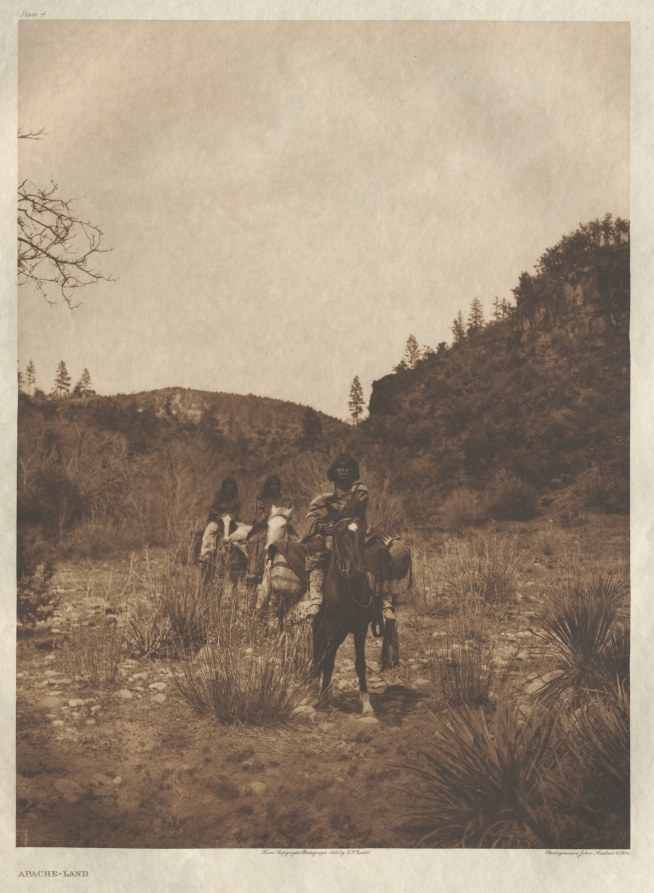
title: Portfolio I, Plate 4: Apache-Land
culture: America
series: The North American Indian: being a series of Portfolios picturing and describing the Indians of the United States, the Dominion of Canada, and Alaska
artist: Edward S. Curtis (American, 1868–1952)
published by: The University Press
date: 1903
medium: photogravure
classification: Portfolio